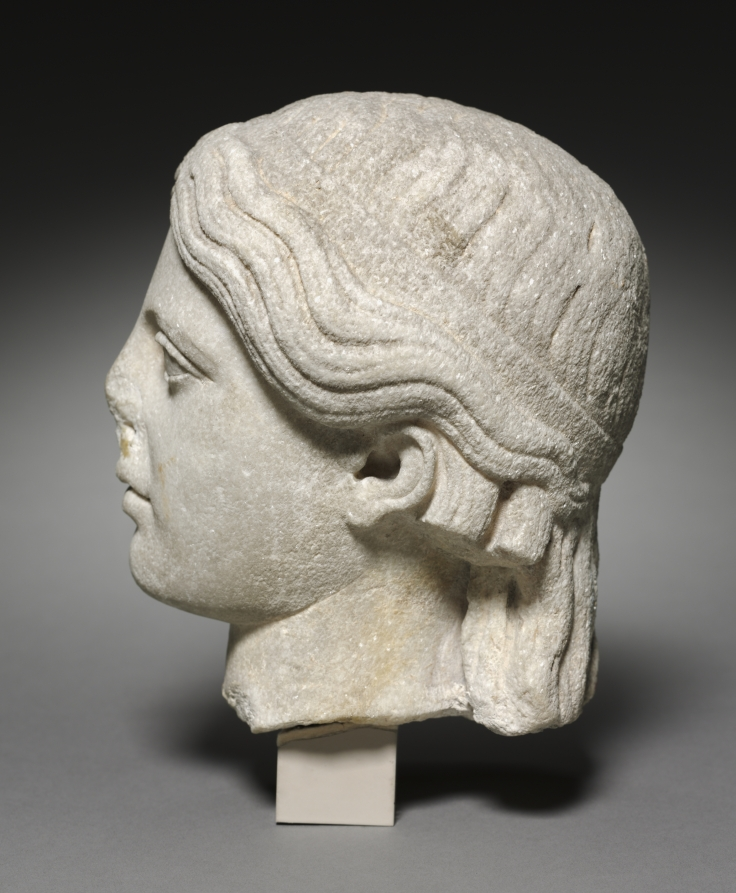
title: Idealized Head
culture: Italy, Roman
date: 50 BCE–100 CE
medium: dolomite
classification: Sculpture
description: This head combines an idealizing style with the serene expression that was characteristic of early Classical sculpture in Greece. Though copies of Greek masterpieces were popular in Rome during the late Republic and early empire, Romans also created many new sculptures that emulated the Classical style, which they felt conveyed a sense of the divine. This statue was probably one such piece, borrowing iconographically and stylistically from various Greek examples.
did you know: This head could represent a woman or goddess, or a youthful god such as Apollo.